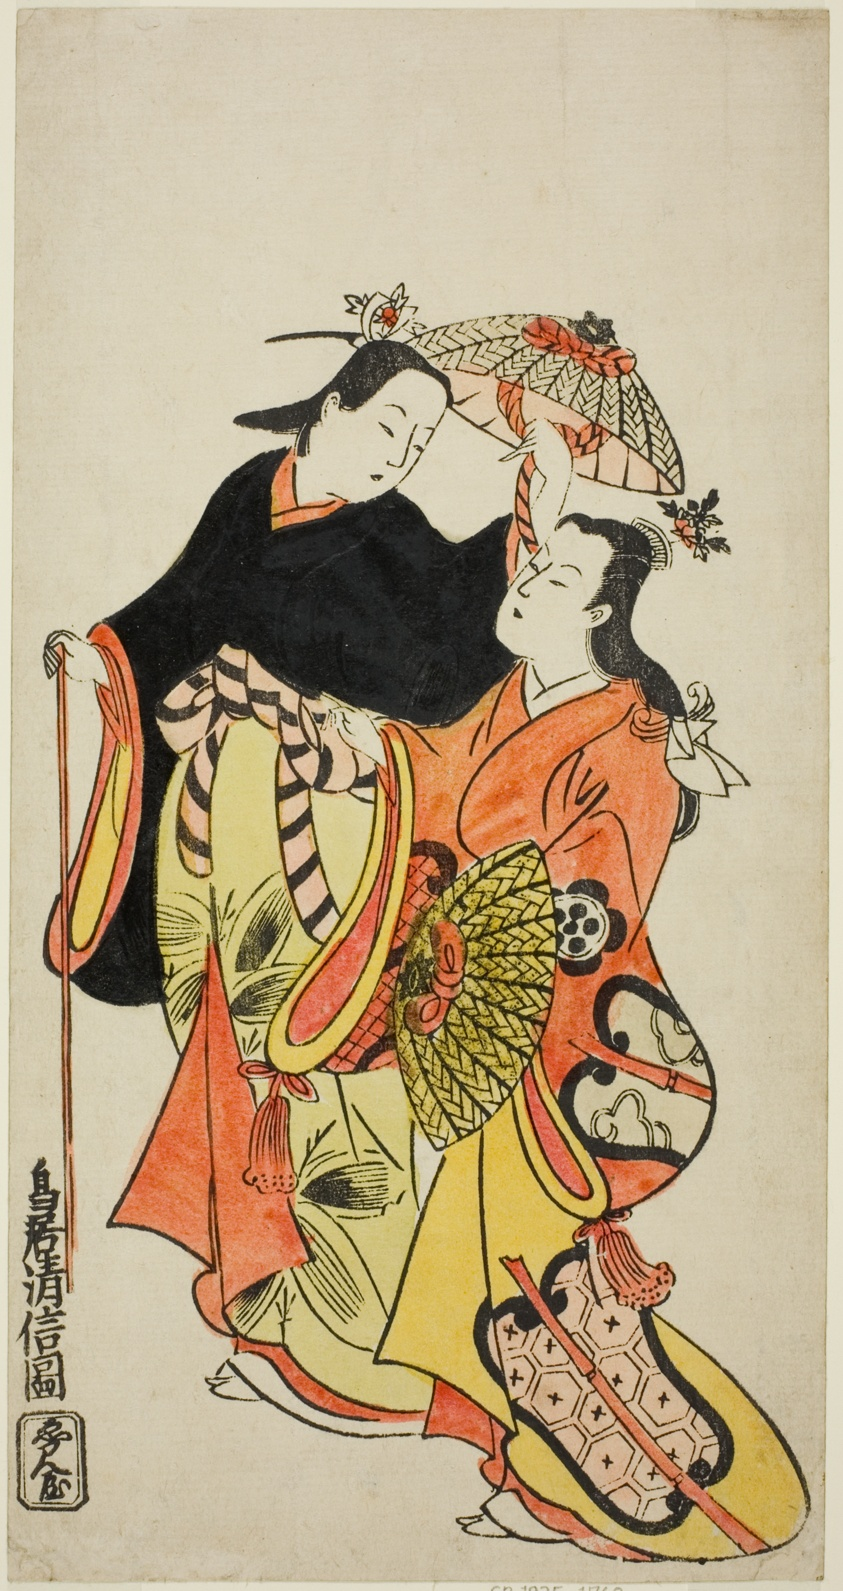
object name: Print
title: The Actors Ichikawa Monnosuke I and Dekijima Daisuke II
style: Japanese (culture or style)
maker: Torii Kiyonobu II (Japanese, active c. 1725-61)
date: c. 1728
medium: Hand-colored woodblock print; hosoban, urushi-e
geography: Japan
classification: woodblock print; print; asian art